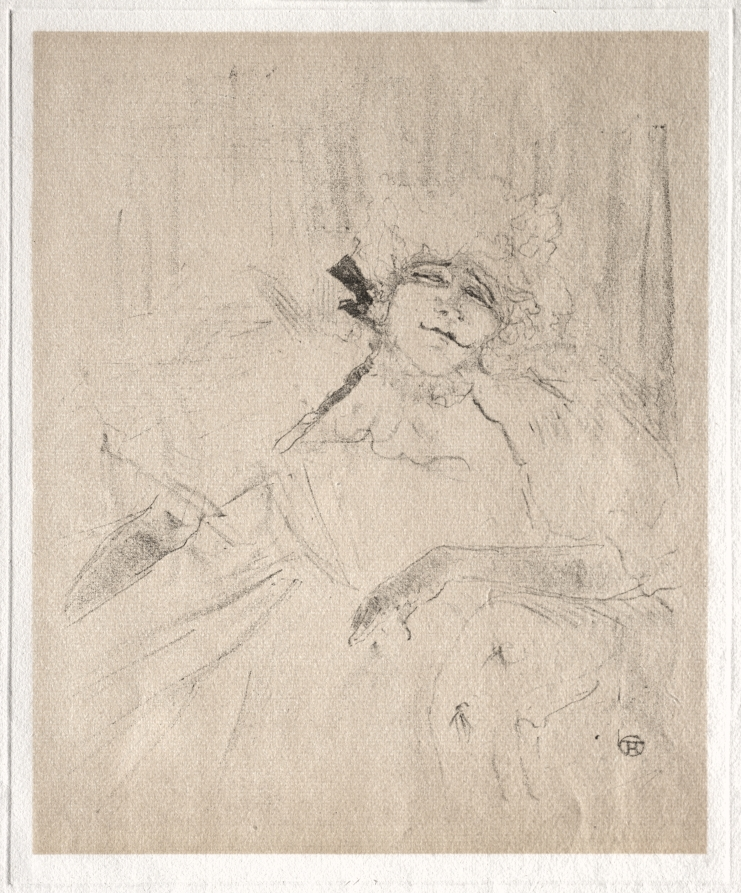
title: Yvette Guilbert: Chanson Ancienne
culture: France, 19th century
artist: Henri de Toulouse-Lautrec (French, 1864–1901)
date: 1898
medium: lithograph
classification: Print